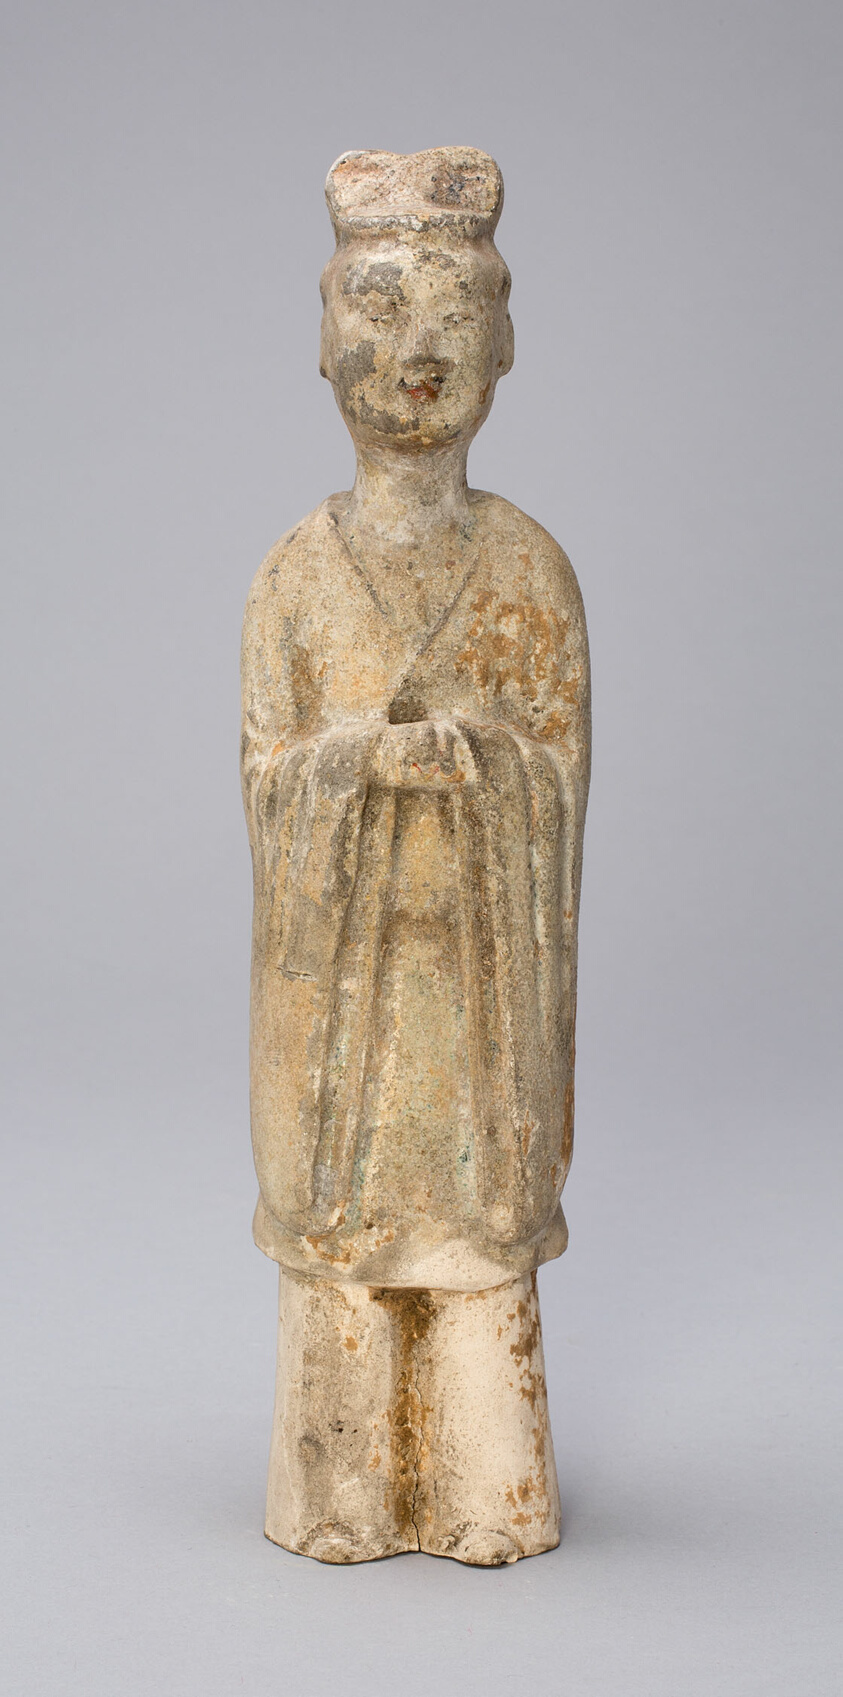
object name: Sculpture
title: Standing Figure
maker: China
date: Tang dynasty (618–906)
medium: Earthenware with traces of pigment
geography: China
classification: ceramics; asian art